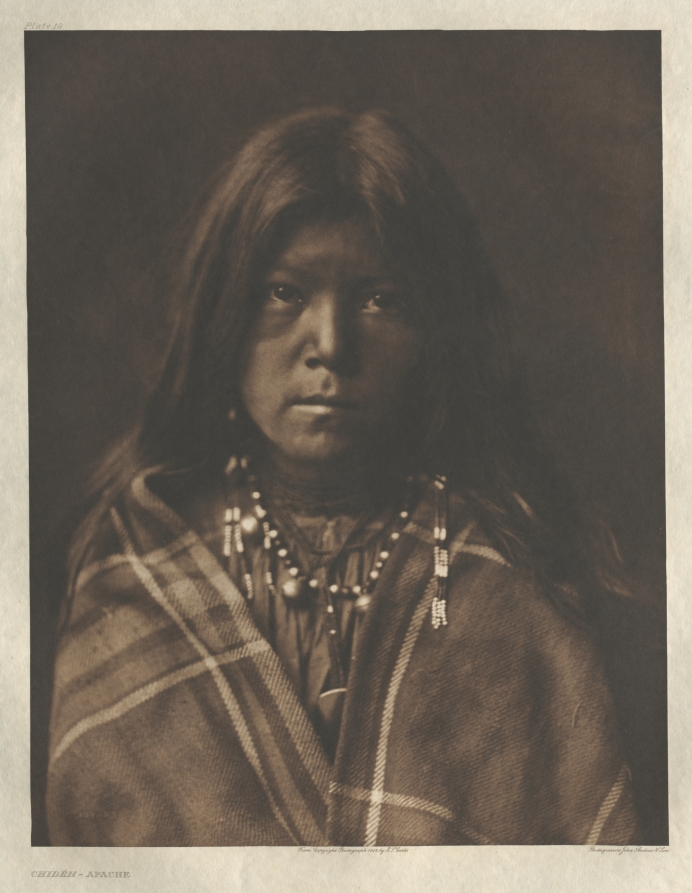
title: Portfolio I, Plate 18: Chideh-Apache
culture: America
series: The North American Indian: being a series of Portfolios picturing and describing the Indians of the United States, the Dominion of Canada, and Alaska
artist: Edward S. Curtis (American, 1868–1952)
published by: The University Press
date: 1903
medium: photogravure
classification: Portfolio